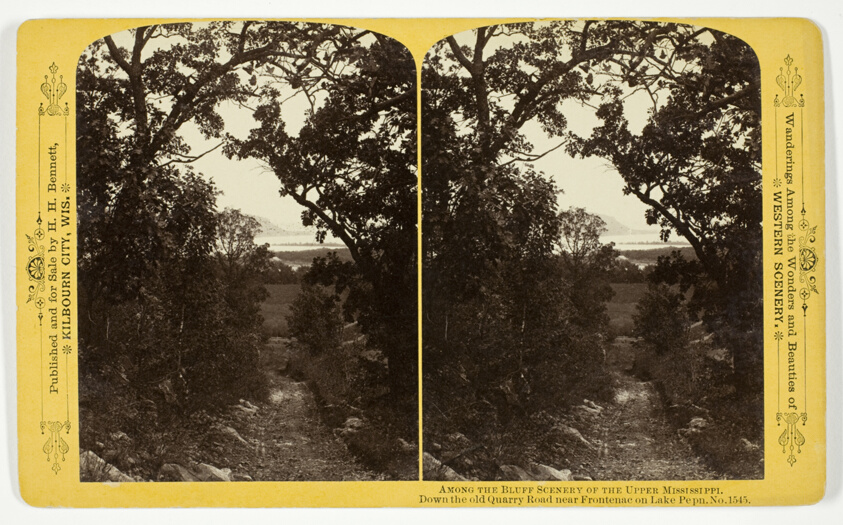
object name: Photograph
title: Down the old Quarry Road near Frontenac on Lake Pepin, , No. 1545 from the series "Among the Bluff Scenery of the Upper Mississippi"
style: 19th century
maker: Henry Hamilton Bennett (American, born Canada, 1843–1908)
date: 1870/1908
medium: Albumen print, stereo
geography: United States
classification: stereograph (albumen); albumen silver print; photographic process; photography; photograph